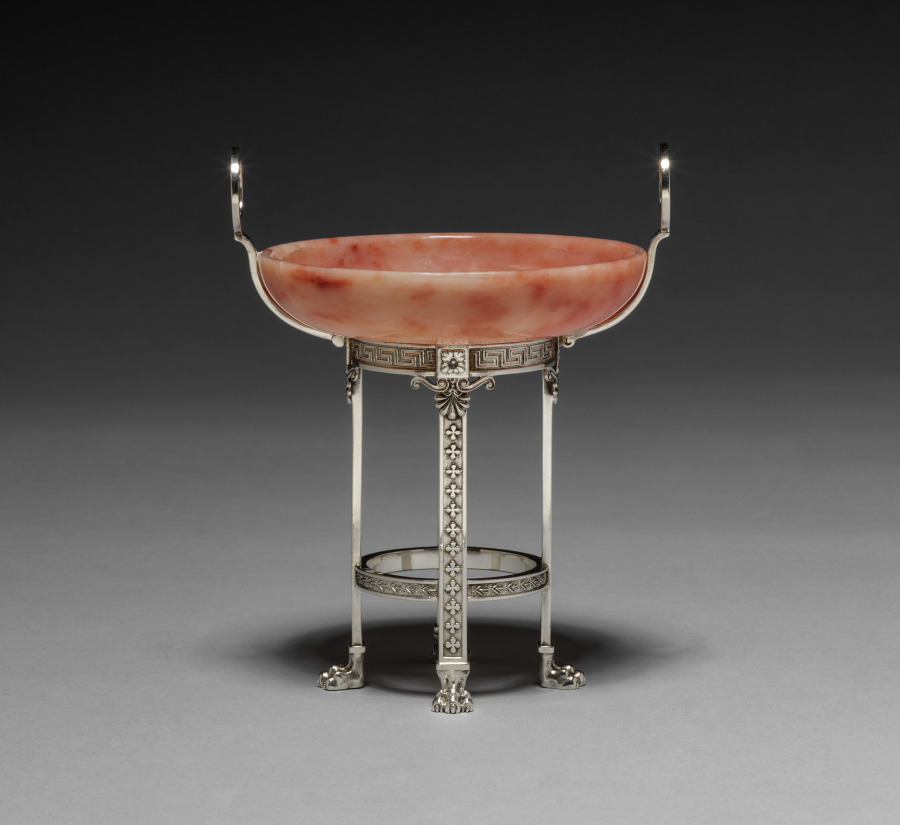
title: Miniature Compote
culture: Russia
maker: House of Fabergé (Russian, 1842–1918)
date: 1896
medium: silver, aventurine quartz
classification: Silver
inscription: Stamped: Fabergé (in Cyrillic) surmounted by double-headed eagle (imperial warrant); 1896, surmounted by tester's initials for Lev Oleks (active 1895-8), 84, Saint George [three punch assay mark for Moscow]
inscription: Scratched: 7796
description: The House of Fabergé specialized in the creation of little treasures intended as opulent personal gifts. In creating luxurious accessories for a desk or tabletop, Fabergé often used native hardstones such as multicolored agate and quartz, green nephrite, pink rhodonite, and rock crystal found in the Ural Mountains of western Russia. Fabergé's designers often paired hardstones with silver mounts, particularly in the Moscow workshop where the silver studios were concentrated.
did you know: Pink aventurine is the rarest form of this type of quartz, which is most commonly found in an olive green form.